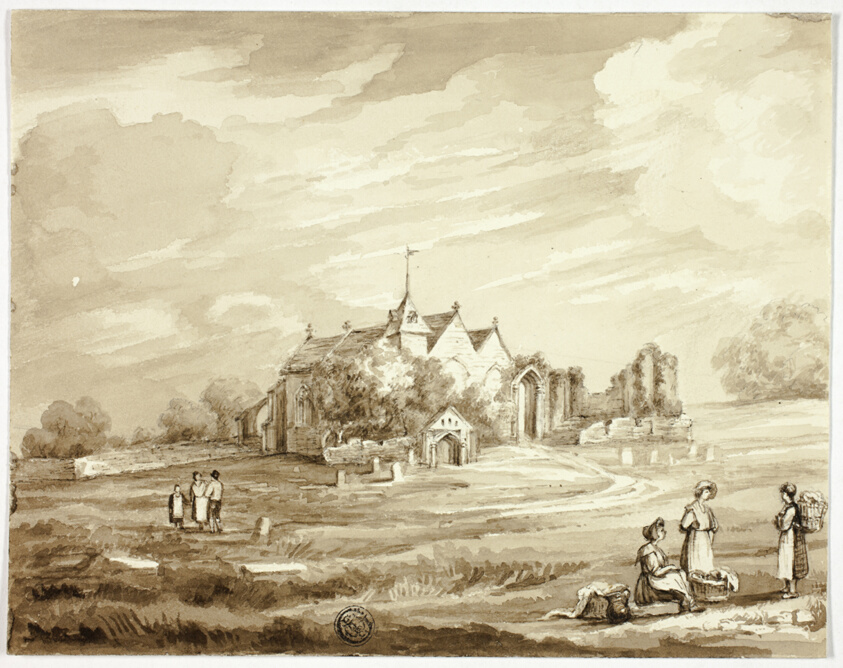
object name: Drawing and Watercolor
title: Winchelsea Church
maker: Elizabeth Murray (English, c. 1815-1882)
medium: Brush and brown ink and wash, over traces of graphite, on ivory wove paper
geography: England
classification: ink or chalk wash; drawings (visual works); prints and drawing